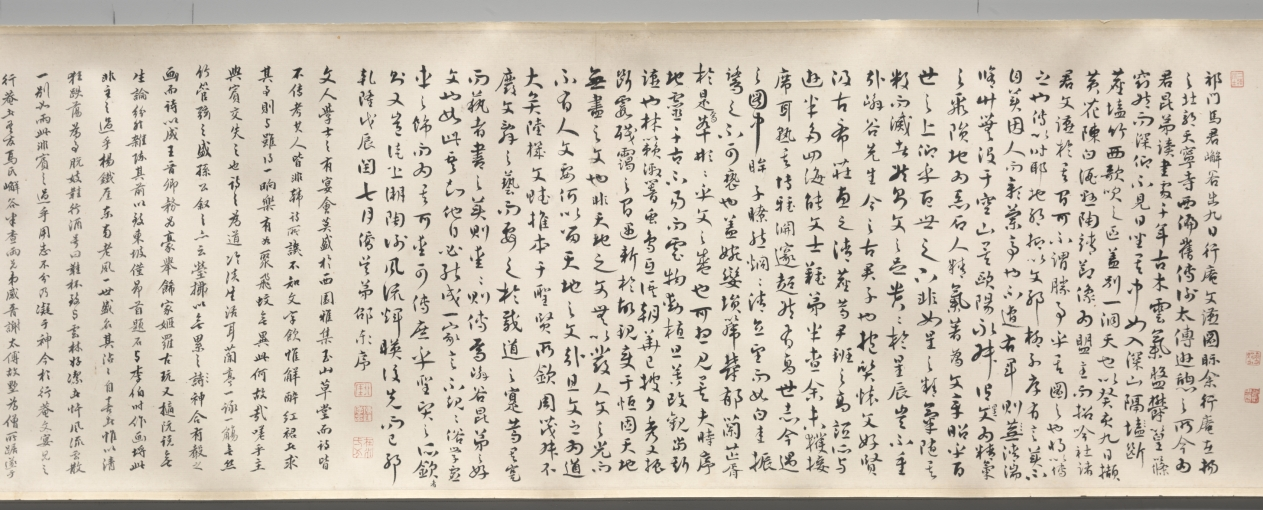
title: The Ninth Day Literary Gathering at Xing’an [Temporary Retreat]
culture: China, Qing dynasty (1644-1911)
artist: Fang Shishu (Chinese, 1693–1751)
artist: and Ye Fanglin (Chinese, active late 1600s–mid-1700s)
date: 1743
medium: Handscroll; ink and color on silk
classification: Painting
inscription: Fang Shishu's seal at beginning of painting: Ou ran shi de 偶然拾得. Ye Fanglin's seal at end of painting: Fanglin 芳林. Frontispiece title dated 1743 and 3 seals of Chen Bangyan 陳邦彦 (1678-1752).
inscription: 行庵在揚州北郭天寧寺西隅，馬君嶰谷半槎兄弟購僧房隙地所築，以為游息之處也。寺為晉謝太傅別墅。西隅饒古木，䨴鬱陰森，入林最僻，不知其近郛郭。庵居其中，無斲礱髤采之飾，惟軒庭多得清蔭，來憩者每流連而不能去。乾隆癸亥九日，積雨既收，風日清美，遂約同人，咸集於斯，中縣［懸］仇英白描陶靖節像，采黃花，酌白醪為供，乃以人世難逢開口笑，菊花雖插滿頭歸分韻賦詩。陶陶衎衎，觴詠竟日。既逾月，吳中寫真葉君敬［震］初適來，群貌小像，合為一卷，方君環山補景，命曰九日行庵文讌圖。裝池成，將各書所作於後，而囑鶚為之記。記按圖中共坐短榻者二人：右箕踞者，為武陵胡復齋先生期恆；左抱膝者，為天門唐南軒先生建中也。坐繩床者二人：中手牋者，歙方環山士庶；左仰首如欲語者，江都閔玉井華也。一人坐藤塾捻髭者，鄞全謝山祖望也。一人倚石坐若凝思者，臨潼張漁川四科也。樹下二人：離立把菊者，錢唐厲樊榭鶚；袖手者，錢唐陳竹町章也。一人憑石床坐撫琴者，江都程香溪先生夢星也。聽者三人：一人垂袖立者，祁門馬半查曰璐；二人坐瓷塾，左倚樹、右跂腳者，歙方西疇士疌 、汪恬齋玉樞也。二人對坐展卷者，左祁門馬嶰谷曰琯，右吳江王梅沂藻也。一人觀者，負手立於右，江都陸南圻鐘輝也。從後相倚觀者一人，歙洪曲溪振珂也。童子種菊者三人：樹間侍立者一人，撰杖、執卷者各一人。其植有蕉、有竹，又有雜樹，作丹黃青碧之色，紀時也。夫重九佳名，舉俗所重，而高常侍歎獨坐而搔首，陸天隨感登高以剫門，無其時地與人耳。今吾儕幸生太平，遇勝地，又皆素心有文之侶，固人世不可多得之會；而此十六人者，或土斷，或客游，聚散不常。異日者，歲月遷流，撫節物以有懷，一披此圖，悅如晤對。將來覽者，或亦不異此意乎。甲子夏五十有四日厲鴞記並書。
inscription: 揚州為江北大都會，居民連甍接楹，笙歌輿從，竟日喧聚，其於淸歌雅集，葢罕矣。城北天寧寺，為晉謝公駐節時所游息，其中有行庵，吾友馬君嶰谷、半查兄弟之小築也。地不踰五畝，而老樹古藤，森蔚相望，皆千百年物，間以修竹，春鳥秋蟲，更唱迭和，其間曲廊高榭，位置閑適。出門未數百步，即黃塵濁流極目，令人作惡。而此中獨蕭然有人外之思。乾隆八年九日，嶰谷兄弟招集同社一十四人祀陶公，出所藏仇實父白描像懸於閣上，各賦一詩。予方留滯西泠，未得預也。又踰旬而予至，諸君方擬繪圖記事，嶰谷曰：是不可無君。乃以展日更舉，令予得陪卷軸之末；而洪君曲溪，兩度皆以病失約，然故吟社中人也，亦補入焉。予太息謂諸君曰：謝公之風流，千古如在；然其游息於斯也，則與東山賓從之樂稍不同矣。公之為是行也，蓋以符氏之亂，思北定中原也。而其時公巳困於讒口，不自安於朝；雖在河朔極有可乘之會，而神明內索，徘徊不克自前。老師左次，竟無尺寸之功，坐失事幾。吾常過邵伯之埭，吊法雲之荒祠，未嘗不喟然累啼，以為明德之衰也。至若九日嘉名，陶公高格，固在羲皇懷葛之間；然而讀其 止酒之詩，蒼梧漢水之感，以瘦詞寄其孤憤則夫黃花白酒，蓋亦不得巳而漫與焉者。今吾輩生逢太平之日，書淫墨癖，是處留連，胸次中了無一事，為江湖之幸民，論人雖甚媿，論其時與地，則不可不私相慶也。諸君曰：善。圖之詳巳見於厲君樊榭記中。予之許為嶰谷兄弟序斯圖也，三年於茲；今夏重披圖捉筆，而唐丈南軒，巳化為異物矣。對酒當歌，人生幾何，願與諸君並日相遇從焉。丙寅夏杪孤山社小泉翁全祖望序。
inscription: 6 additional colophons and 15 additional seals: 1 colophon, dated 1746, and 1 seal of Huang Zhijun 黃之雋 (1668-after 1746); 1 colophon and 2 seals of Zha Xiang 查祥 (1718 jinshi); 1 colophon, dated 1746, and 3 seals of Zhang Siwen 張思問; 1 colophon, dated 1748, and 4 seals of Shao Dong 卲東 (1721 jinshi); 1 colophon, dated 1753, and 2 seals of Fang Shiju 方世舉 (signing as Fang Funan 方扶南); 1 colophon, dated 1808, of Ruan Yuan 阮元 (1764–1849); 3 seals unidentified.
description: By the 1700s, Yangzhou was flourishing both economically and culturally as the most prosperous city in China, having surpassed all other Jiangnan cities in their creation of gardens. This group portrait commemorates a literary gathering in the private garden of the salt merchants and art patrons Ma Yueguan (1688–1755) and his brother Ma Yuelu (1697–after 1766) in Yangzhou. Ma Yueguan received imperial recognition for providing financial aid and food relief for those affected by flood and drought. Ma Yueguan is seen seated at the end of the painting holding an open scroll while Ma Yuelu stands behind the qin instrument player. Among the guests were officials, scholars, poets, painters, and merchants, a mix of local members of a poetry club reflecting increasing social diversity.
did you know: The two hosts and their fourteen guests were all officials, scholars, poets, painters, and salt merchants.